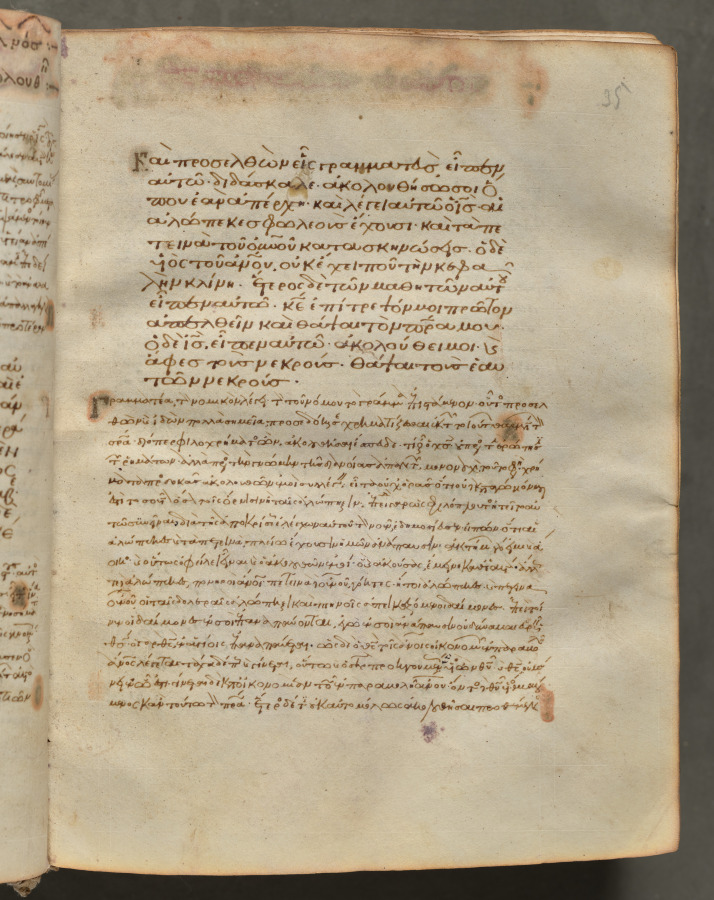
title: Text, folio 35 (recto), from a Gospel Book with Commentaries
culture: Byzantium, Constantinople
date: c. 1000–1100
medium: ink, tempera, and gold on vellum; leather binding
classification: Bound Volume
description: Each of the four gospels in this book opens on a page with brilliantly illuminated borders depicting the author of the text as well as birds—principally peacocks, symbols of the immortality of the soul—and fountains, representing the fountain of life and the salvation of the soul. This volume consists of 428 leaves with texts in Greek. Its level of sophistication suggests that it was probably written and decorated in a monastery in Constantinople.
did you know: Gospel Books were carried in procession through Byzantine churches.